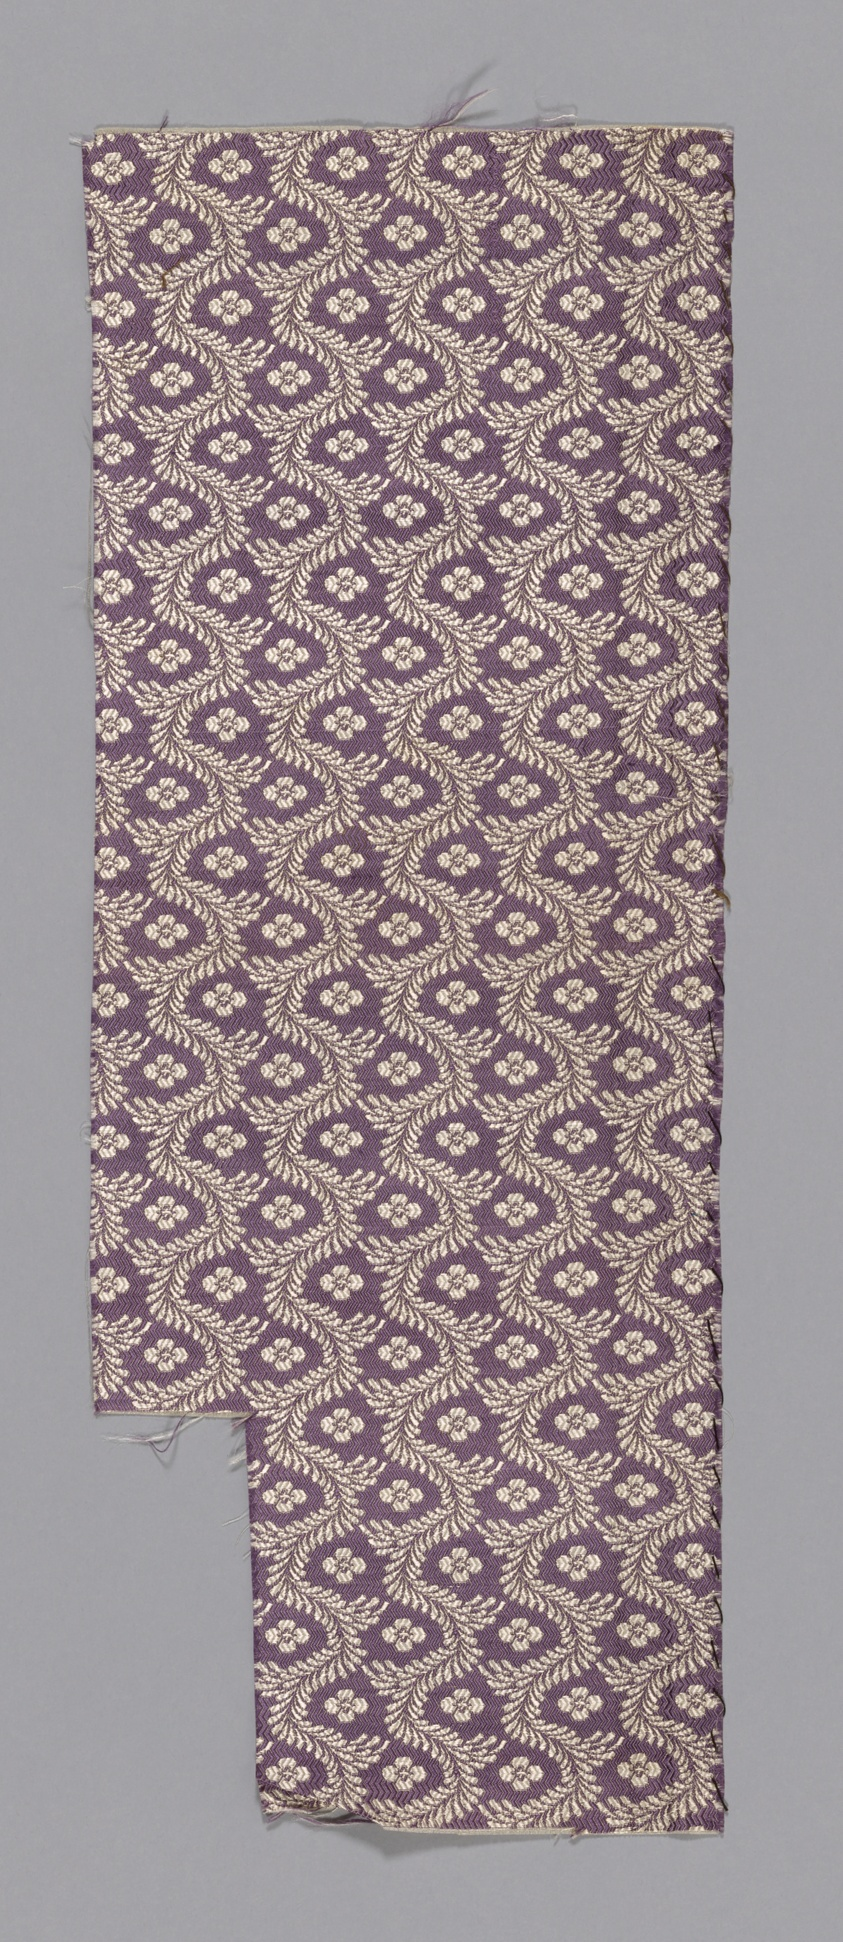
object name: Textile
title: Fragment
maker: Japan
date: late Edo period (1789–1868), 1801/25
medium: Fancy compound twill, silk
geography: Japan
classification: textile; weaving